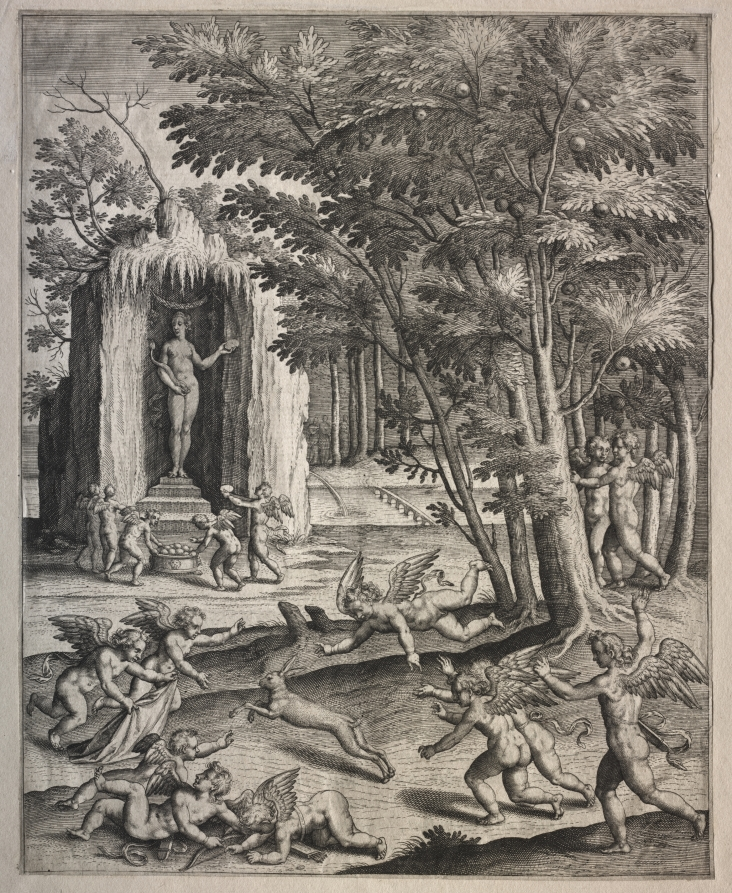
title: Cupids at Play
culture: Flanders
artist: possibly by Hieronymus Wierix (Flemish, 1553–1619)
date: 1500–1599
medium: engraving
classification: Print